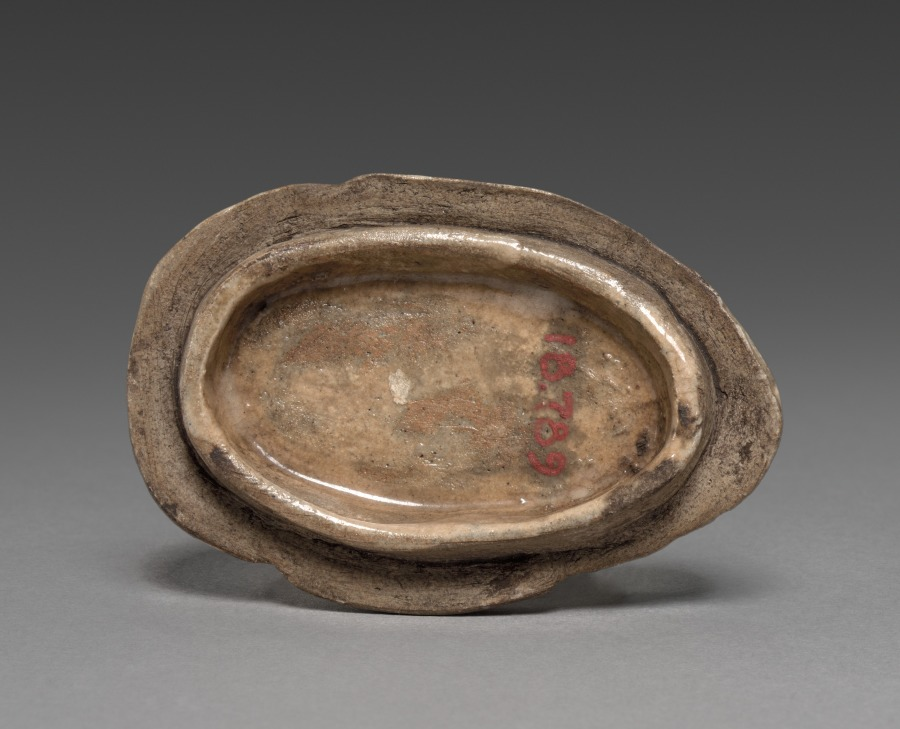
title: Box of Incense Container (Kōgō) in the Shape of a Mandarin Duck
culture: Japan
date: c. 1700–1868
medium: pottery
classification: Ceramic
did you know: The artist incised the bird's feet on the bottom of the box.